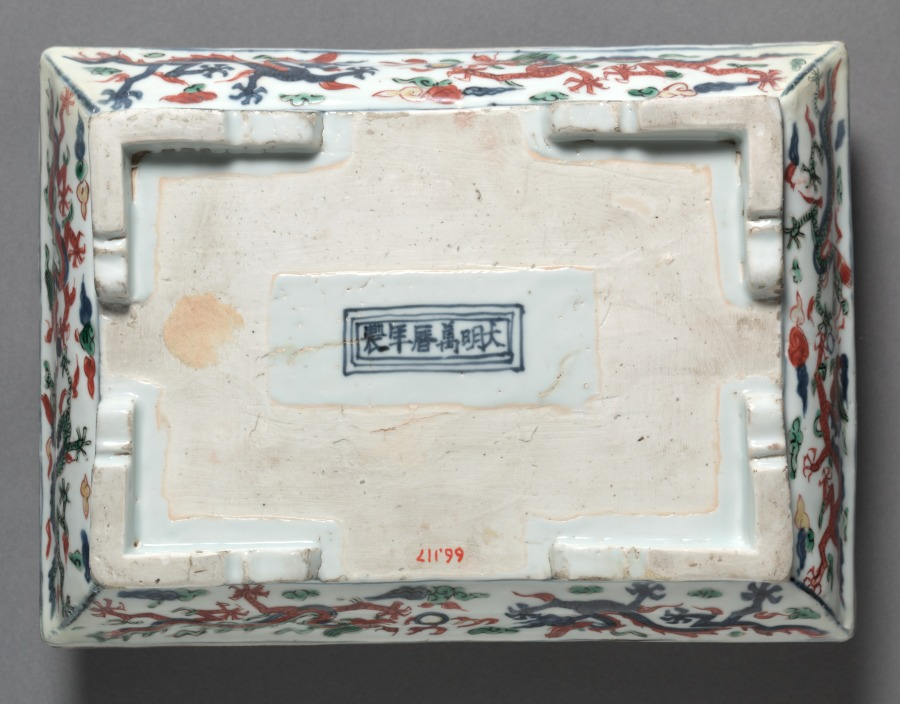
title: Box with Cover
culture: China, Jiangxi province, Jingdezhen kilns, Ming dynasty (1368-1644), Wanli reign (1572-1620)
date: 1573–1620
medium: porcelain with wucai (five color) overglaze enamel decoration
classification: Ceramic